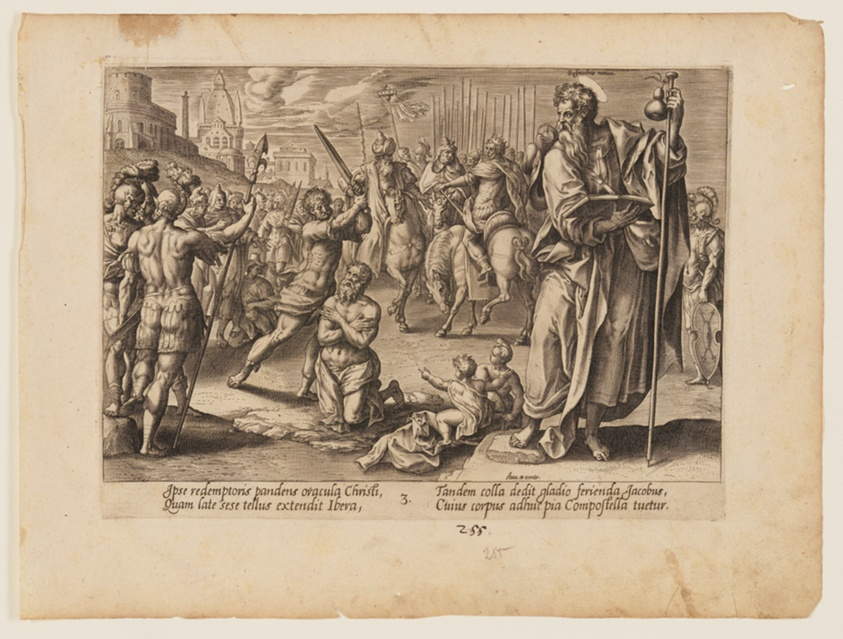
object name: Print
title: The Martyrdom of St James Major, from The Martyrdom of Christ and the Apostles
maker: Hendrick Goltzius (Dutch, 1558–1617); after Maarten de Vos (Flemish, 1532–1603); published Hieronymus Cock (Netherlandish, c. 1510–1570)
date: c. 1578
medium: Engraving on ivory laid paper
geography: Netherlands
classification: engraving; paper; print; prints and drawing